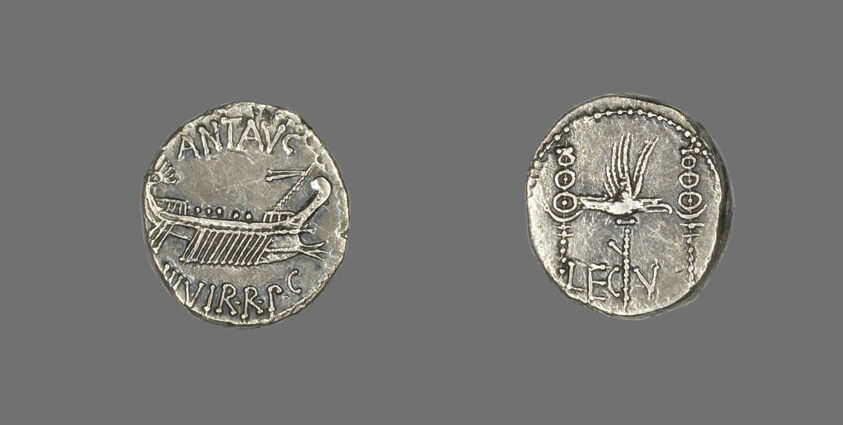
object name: Coin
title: Denarius (Coin) Depicting a Galley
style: roman (ancient, style or period), ancient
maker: Roman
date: 32-31 BCE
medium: Silver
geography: Roman Empire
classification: coin; ancient art